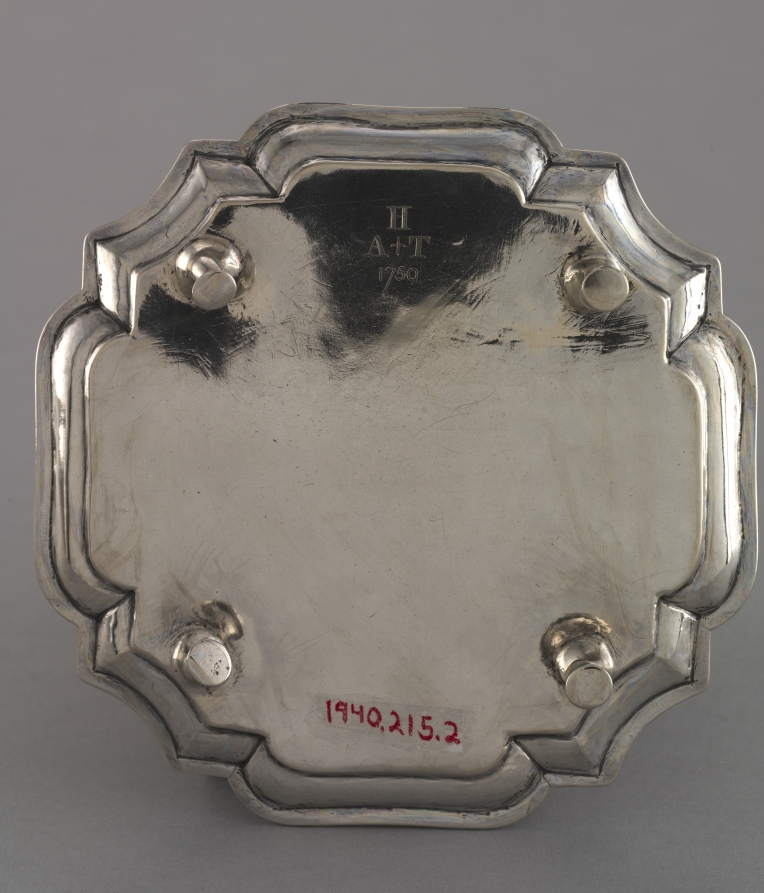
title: Salver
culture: America, Massachusetts, Boston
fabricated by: Jacob Hurd (American, 1702–1758)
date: 1740–50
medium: silver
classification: Silver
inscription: engraved: H over A + T over 1750 in shaded block letters underneath each salver.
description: The coat of arms is that of the Hastings family, the original owners of these serving pieces.